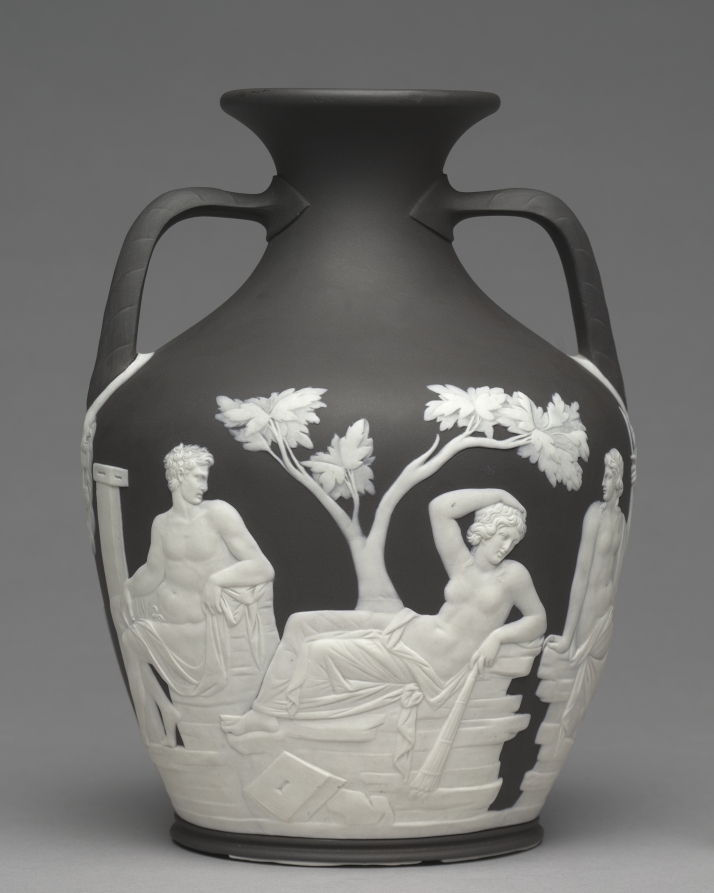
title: Portland Vase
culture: England, Staffordshire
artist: Josiah Wedgwood and Sons (Britain, Staffordshire, est. 1759)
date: c.1790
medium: jasperware with applied decoration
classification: Ceramic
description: The original Portland Vase is a Roman antiquity, made of dark-blue glass, dating from the first century AD. Such a rare archaeological find fascinated aristocratic collectors and artists alike, and eventually the vase came into the hands of the 3rd Duke of Portland in the 1780s. Around 1790 the duke lent the vase to the potter Josiah Wedgwood to make exact replicas in ceramic, of which the Cleveland example is one of the first editions. Eventually, the 4th Duke of Portland deposited the original Roman vase in the British Museum, where it resides today.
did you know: While the scene depicted here is not known for certain, many scholars believe that the Portland Vase portrays the wedding of Peleus and Thetis from Greek mythology.